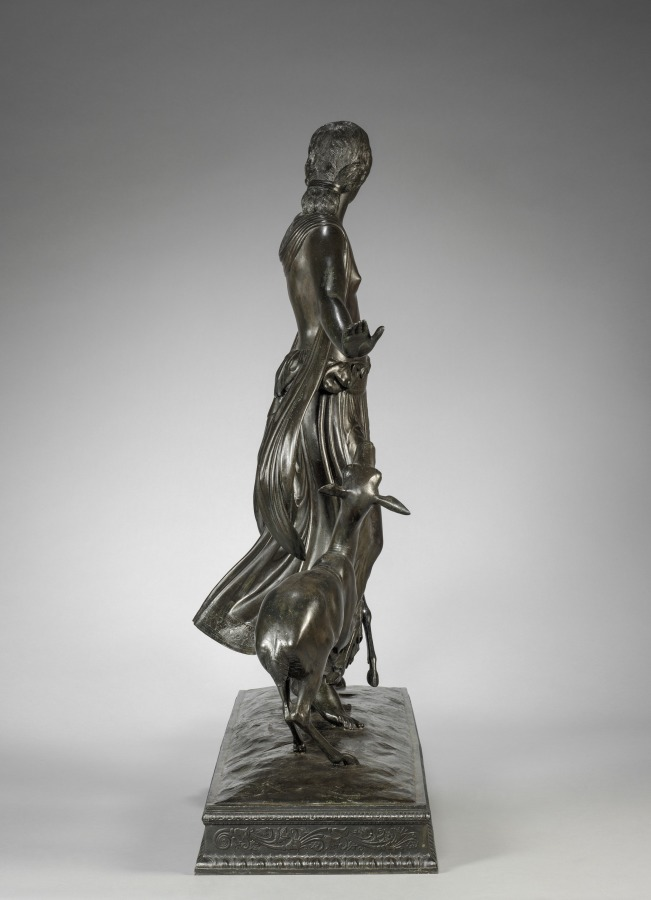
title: Dancer and Gazelles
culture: America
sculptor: Paul Manship (American, 1885–1966)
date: 1916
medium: bronze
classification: Sculpture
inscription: Signed on base: PAUL MANSHIP © 1916.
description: One of Manship’s most popular compositions, this work established his reputation as an important up-and-coming sculptor. Here, his mastery of elegant silhouette is manifest through the gracefully posed dancer and her sleek animal companions. Stylized decorative patterning embellishes the dancer’s hair and swaying skirt.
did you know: Initially interested in painting, Manship opted to pursue sculpture after discovering he had color vision deficiency.